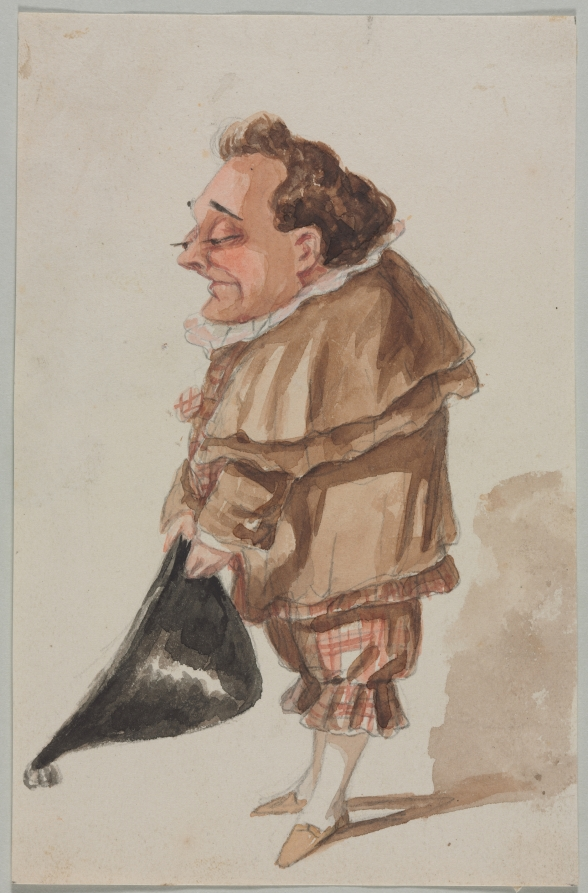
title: Man with a Large Hat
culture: France, 19th century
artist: Paul Gavarni (French, 1804–1866)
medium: pencil with watercolor on paper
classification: Drawing